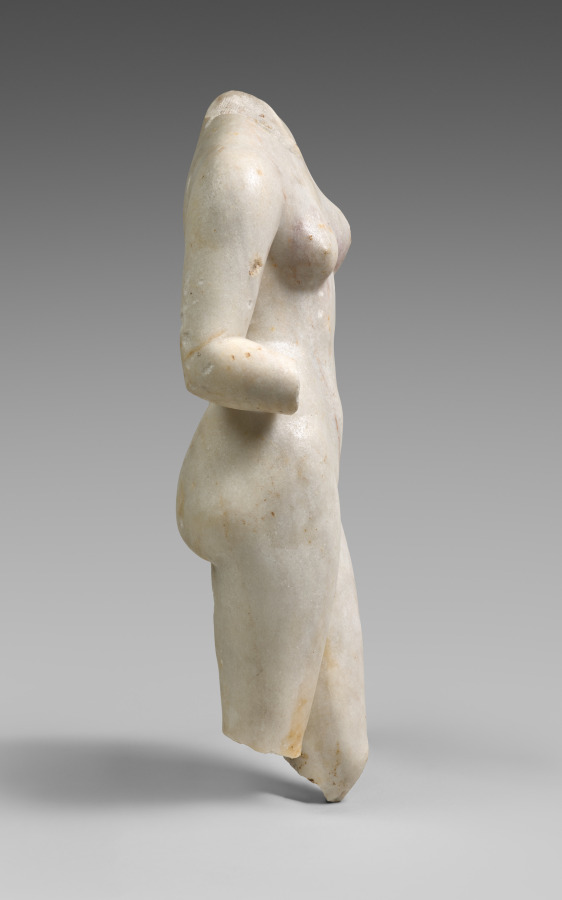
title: Torso of Venus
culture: Roman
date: 1–200 CE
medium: marble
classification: Sculpture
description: As avid collectors of Greek art, ancient Romans valued sculptures for their aesthetic qualities. This torso of Venus was likely inspired by the popularity of Praxiteles's nude Aphrodite from the Greek city-state of Knidos on the western coast of Asia Minor. Displayed in a circular shrine, it became one of the most celebrated sculptures in classical antiquity.